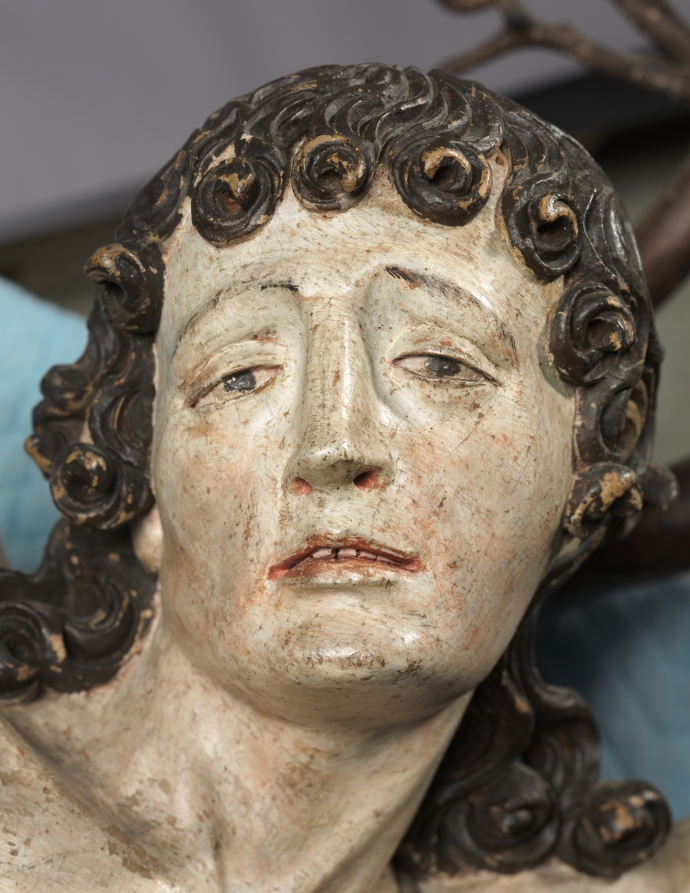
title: Saint Sebastian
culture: Germany, early 17th century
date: c. 1600–1620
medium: painted and gilded wood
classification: Sculpture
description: An early Christian saint and martyr, Sebastian was condemned to death by the Roman emperor Diocletian. Bound to a tree and shot with arrows, he survived—only later to be martyred by beating. This figure embodies the blend of stylistic influences that characterized German sculpture in the early 1600s. The graceful pose and anatomical naturalism of the legs indicate the influence of Italian Mannerism, while the crisp, stylized patterns of Sebastian’s hair and loincloth recall German Gothic works from the 1400s. The tree to which Sebastian is bound is an actual branch, shaped and refined to its present appearance.